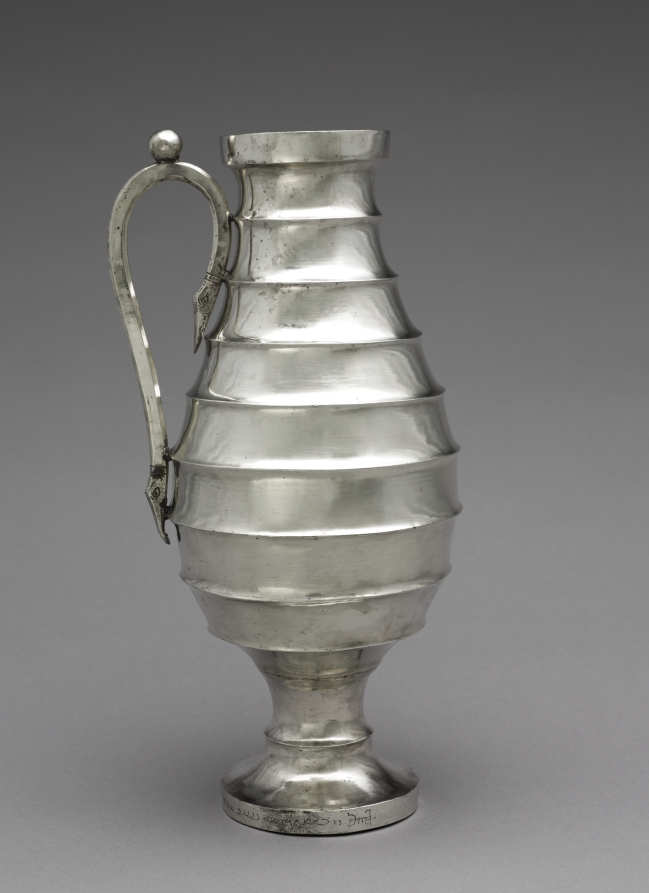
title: Stepped Pitcher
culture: Iran, Sasanian Empire (224–651 CE)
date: 400–600 CE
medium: silver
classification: Metalwork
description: The Sasanians are best known today for their expert work in silver. This museum is fortunate to have one of the most important collections of Sasanian silver vessels in the world.